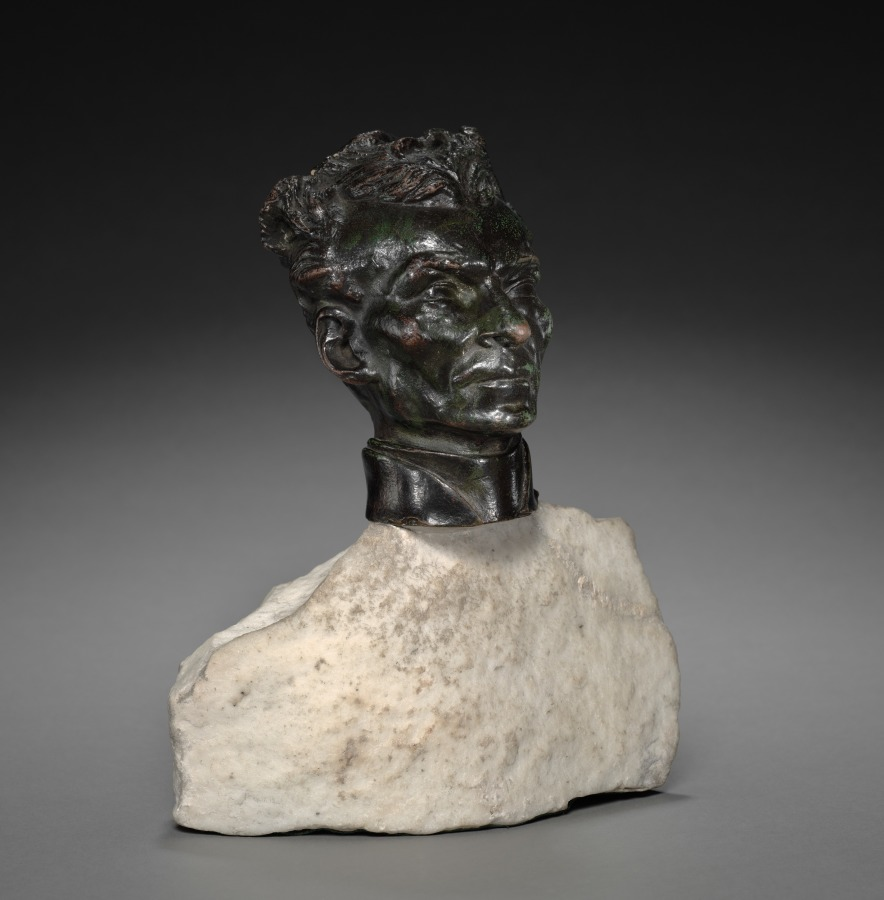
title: Father Pierre-Julien Eymard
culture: France, 19th century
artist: Auguste Rodin (French, 1840–1917)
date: ca. 1863 (original model)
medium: bronze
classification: Sculpture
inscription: Signed on left side of collar: "Rodin"; on base, back right: "A. Rodin"